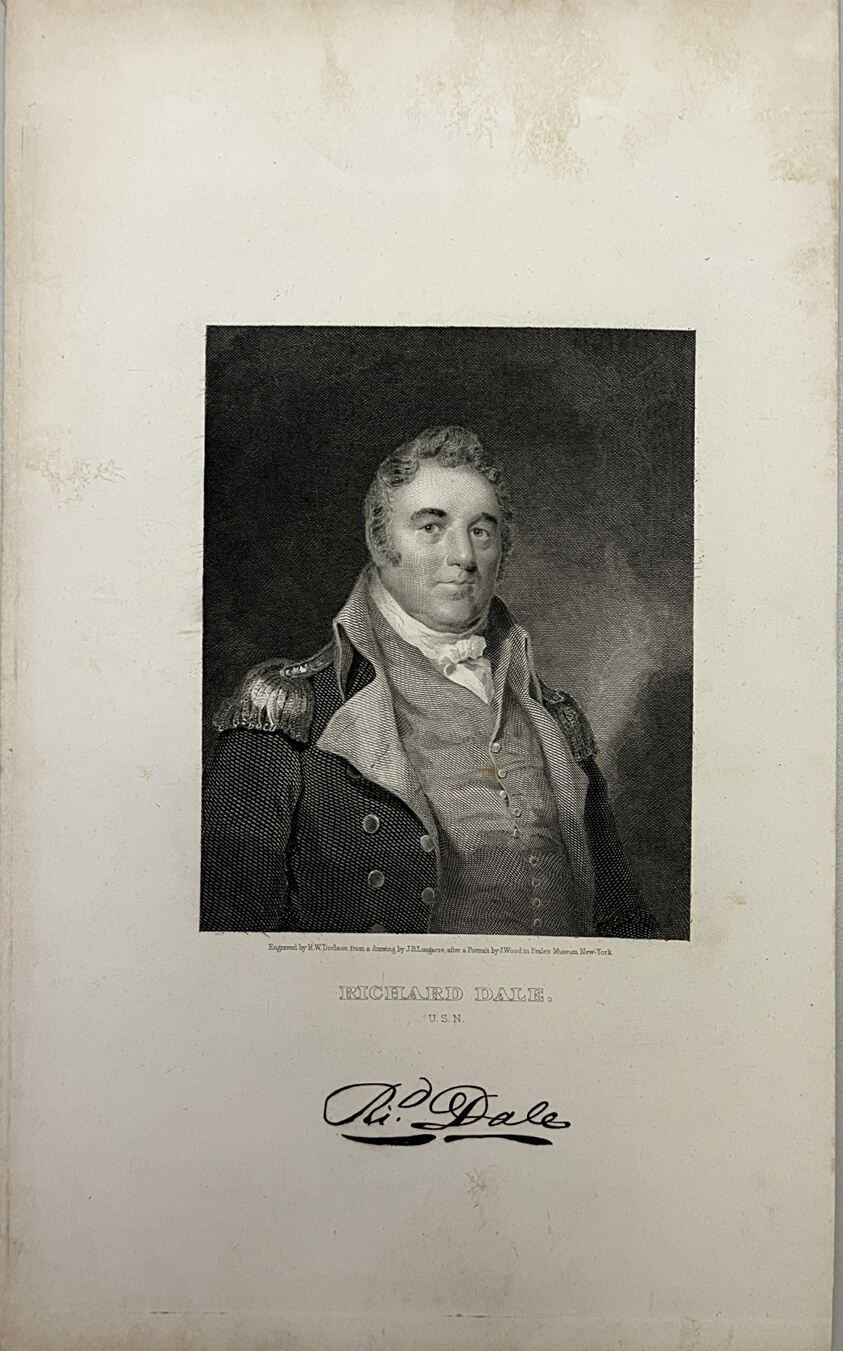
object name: Print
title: Richard Dale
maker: Richard W. Dodson (American, 1812-1867); after James Barton Longacre (American, 1794-1869); after Joseph Wood (American, 1778-1830)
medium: Steel engraving on paper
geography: United States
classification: reproduction; print; prints and drawing